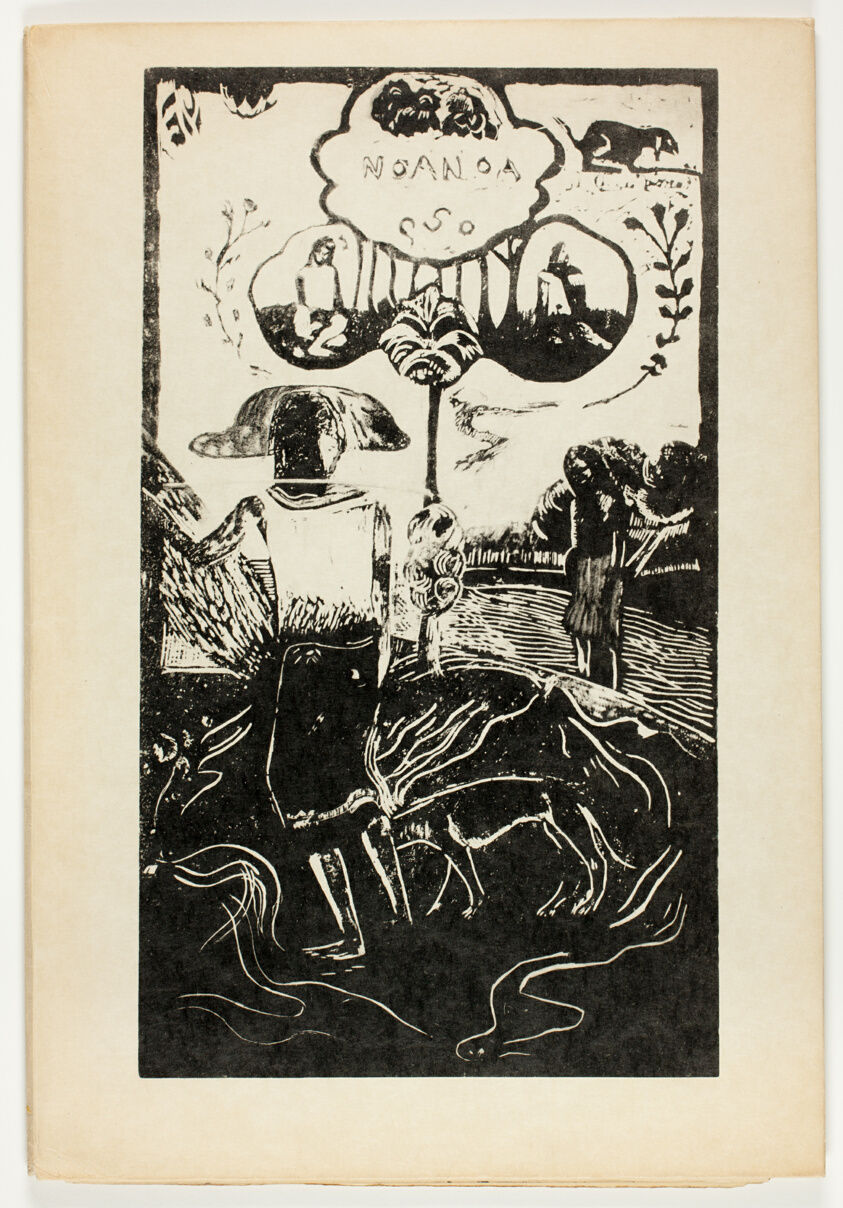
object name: Print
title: Noa Noa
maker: Paul Gauguin (French, 1848-1903)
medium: Collotype with letterpress, in black on cream wove papers, folded, with collotype in black with red on ivory laid paper and envelope, contained within cream wove paper wrapper with collotype in black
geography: France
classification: print; prints and drawing